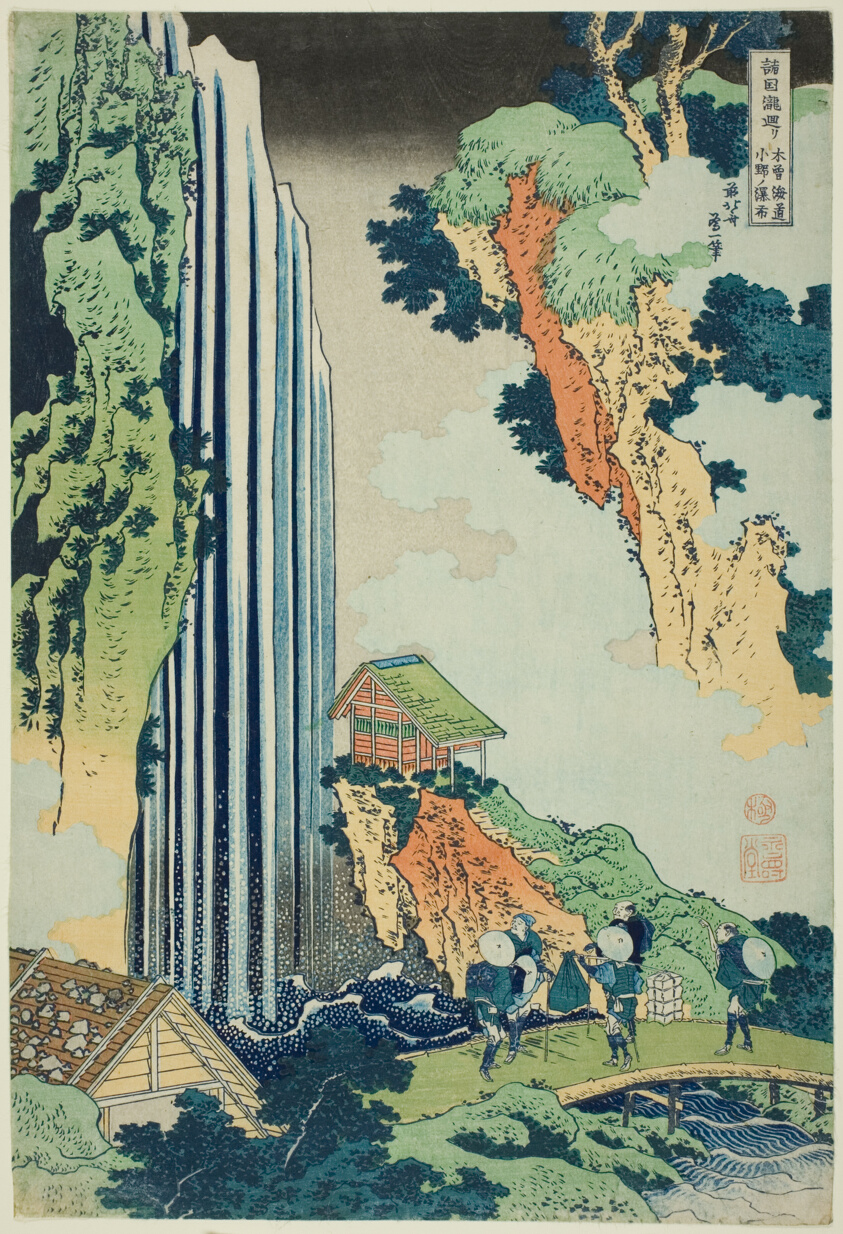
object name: Print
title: Ono Falls on the Kisokaidō Road(Kisokaidō Ono no bakufu), from the series Tour of the Waterfalls in Various Provinces (Shokoku taki meguri)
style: Japanese (culture or style)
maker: Katsushika Hokusai 葛飾 北斎; Japanese, 1760-1849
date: About 1833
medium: Color woodblock print; ōban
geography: Japan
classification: woodblock print; print; asian art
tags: landscapes